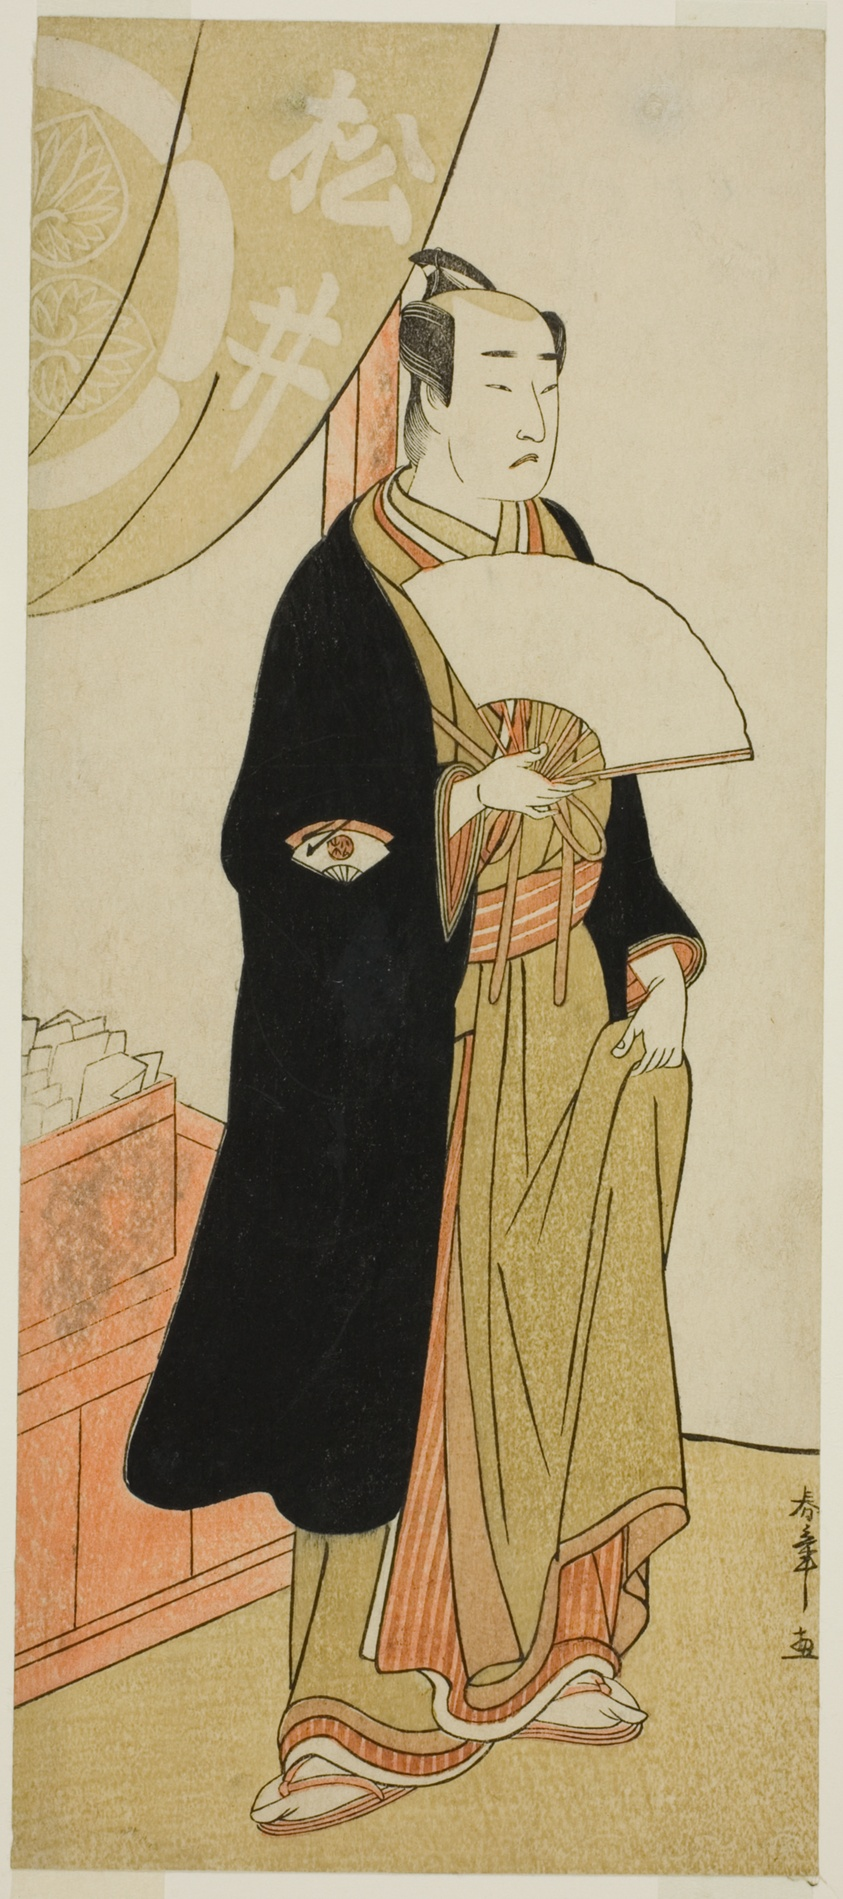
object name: Print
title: The Actor Onoe Matsusuke I in an Unidentified Role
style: Japanese (culture or style)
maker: Katsukawa Shunsho 勝川 春章; Japanese, 1726-1792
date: early 1780s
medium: Color woodblock print; hosoban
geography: Japan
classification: woodblock print; print; asian art